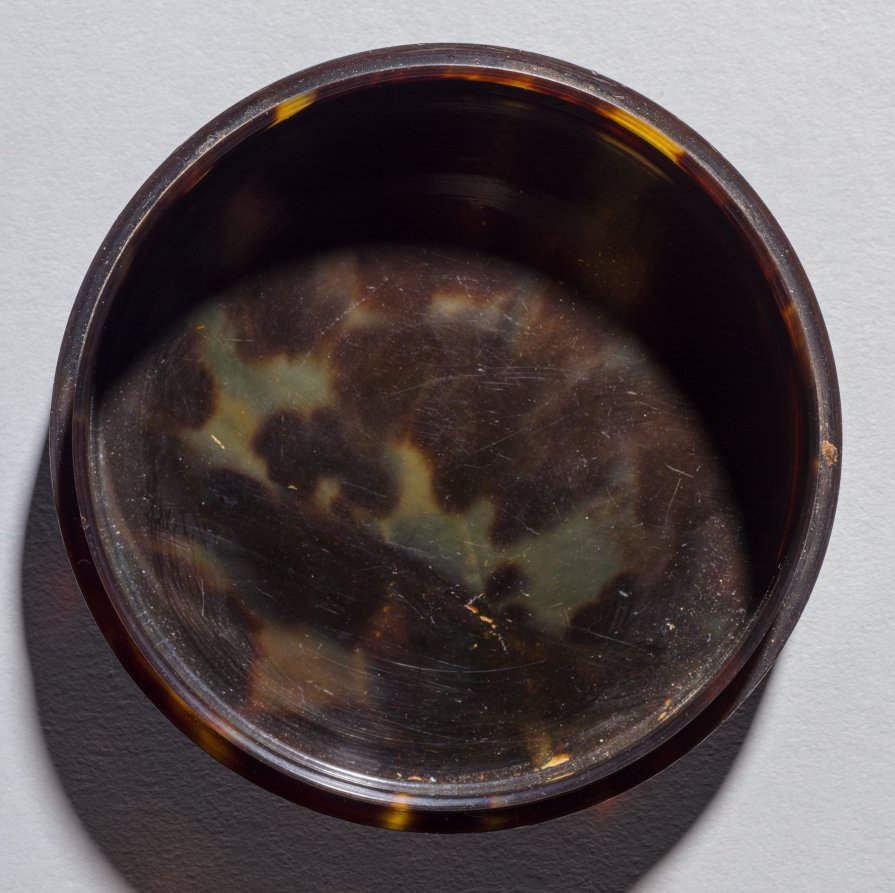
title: Portrait of the Artist's Children Emma and Paul (box)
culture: France, 18th century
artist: Jean-Antoine Laurent (French, 1763–1832)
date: c. 1795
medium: watercolor on ivory, gold mount, set in the cover of a composition bonbonniere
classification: Portrait Miniature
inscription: signed at mid-center "Laurent"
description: This sensitive depiction of his children exhibits Laurent's ability to portray the psychological interiority of his subjects, young or old. The miniature shows Laurent's son and daughter in white chemise gowns with green ribbon accents. They both have striking blue eyes and slightly curled blond hair. The younger sibling tenderly holds the arm of the older one, who sits on a chair strewn with pink rose petals and inscribed with the artist's signature. The children are placed within an environment in which green foliage sprouts small blue and purple flowers. This organic setting reflects 18th-century Western philosophies of natural child rearing, characterized by treating childhood as a period of innocence distinct from adulthood and advocating that children not be treated as miniature adults but instead should have their naiveté celebrated. This philosophy influenced children's clothing. Instead of dressing children as small adults in constrictive costumes, both genders wore loose chemises, like the ones seen here, that encouraged mobility.